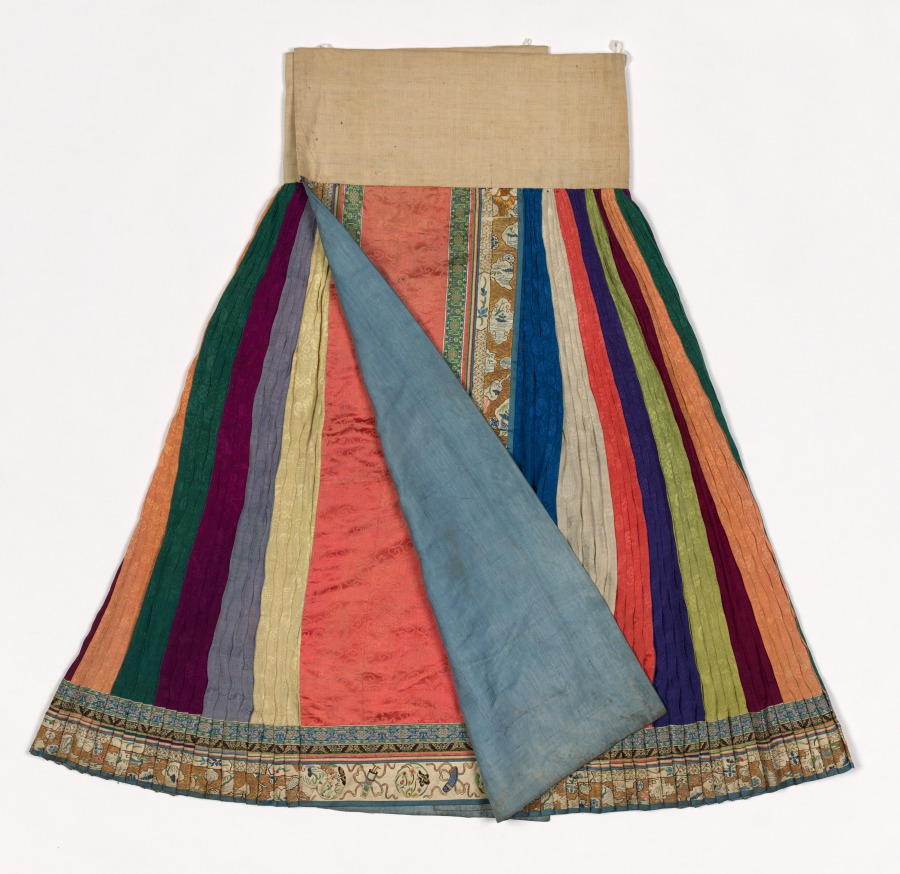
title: Embroidered Skirt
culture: China, Qing dynasty (1644–1911)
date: early 1900s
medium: silk with metal thread embroidery; plain weave cotton ? waistband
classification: Garment